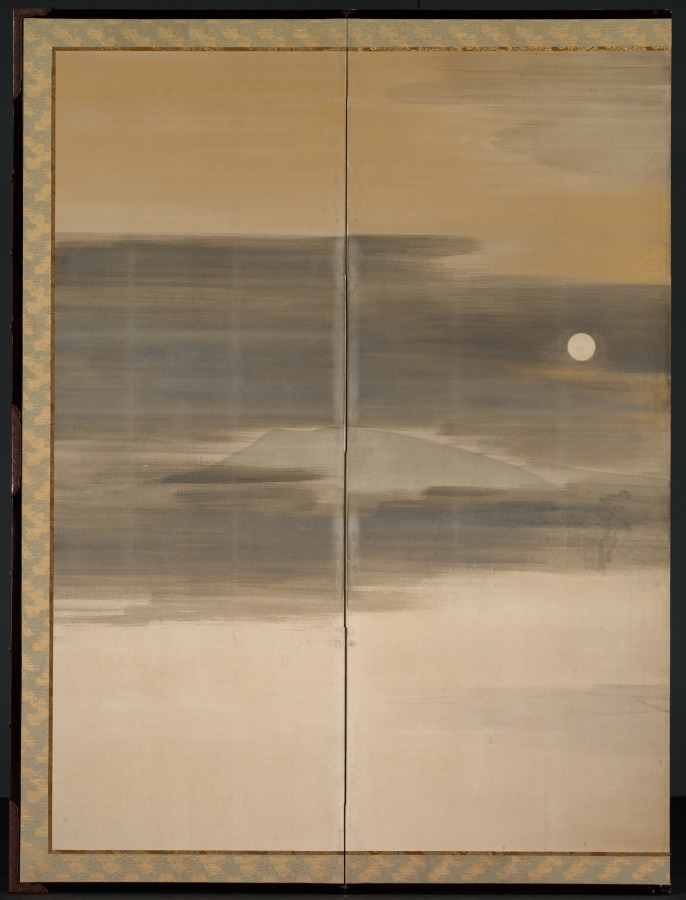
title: Summer Night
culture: Japan, Edo period (1615–1868)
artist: Maruyama Ōkyo (Japanese, 1733–1795)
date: 1784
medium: Six-panel folding screen, ink, gold, and silver on paper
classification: Painting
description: Ōkyo painted these panoramas in the summer of 1784. Regarded as Kyoto's most important painting teacher and accomplished artist, he had studied Western painting techniques, "realistic" sketching from nature, and traditional Japanese style painting (yamato-e). The naturalistic quality of these scenes results from a blend of detailed observation of nature and a remote, even detached regard for man's place in the world.